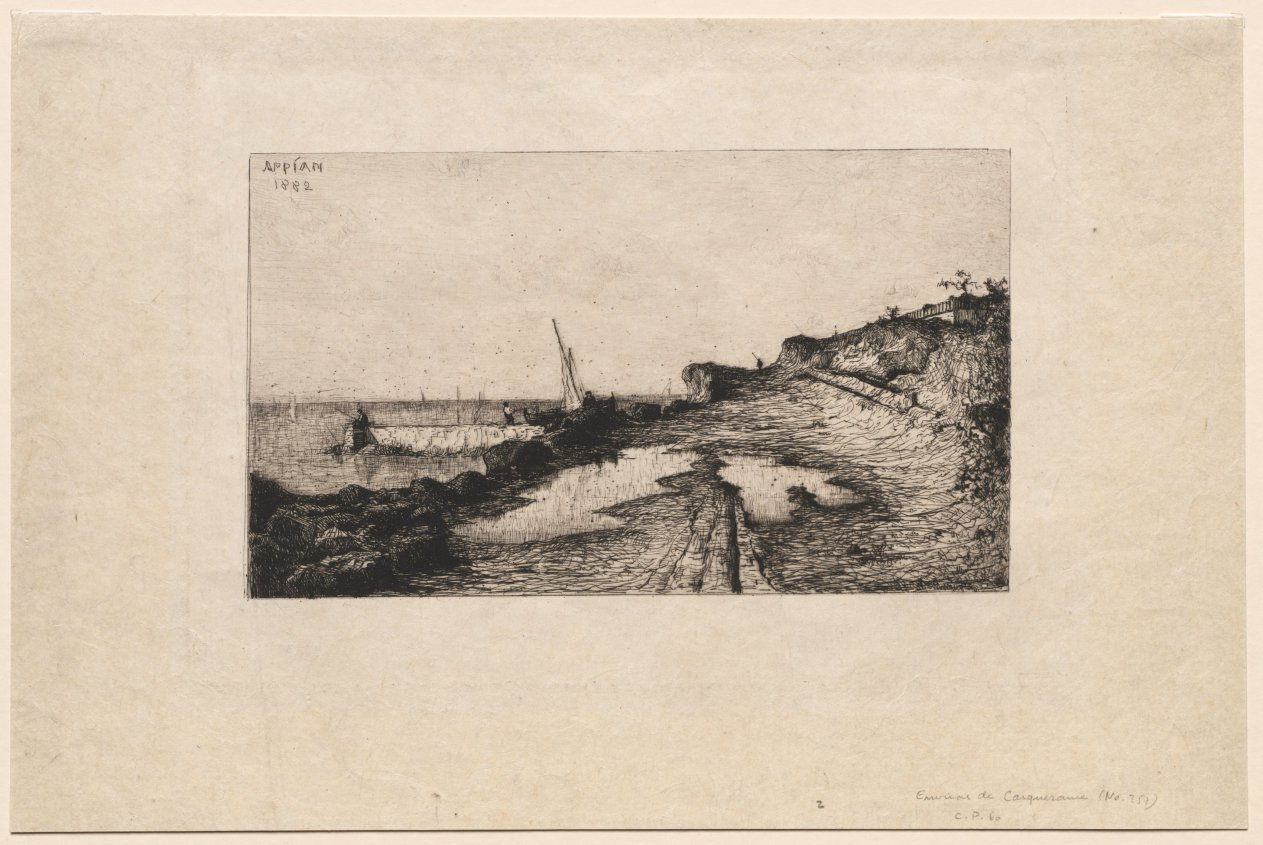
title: Environs of Carqueronne (Environs de Carqueronne)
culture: France, 19th century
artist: Adolphe Appian (French, 1818–1898)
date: 1882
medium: etching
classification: Print